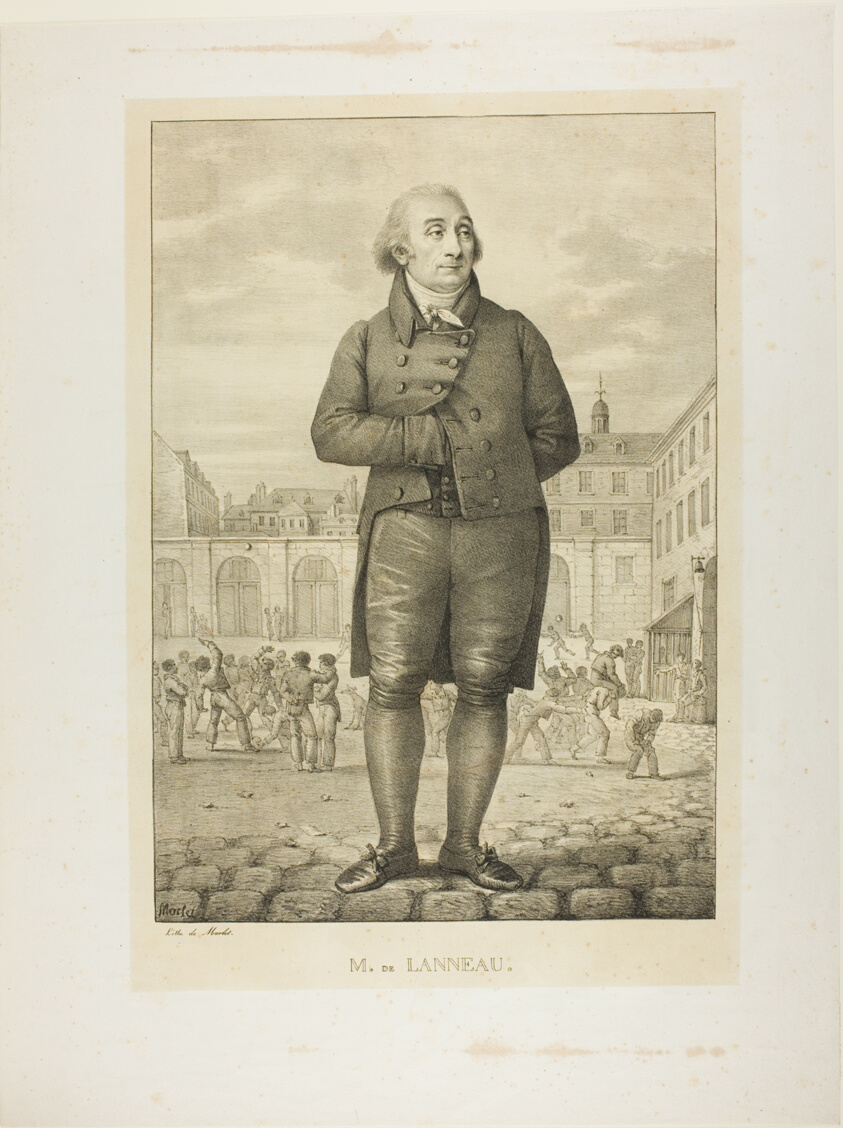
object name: Print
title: Portrait of M. de Lanneau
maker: Jean Henri Marlet (French, 1771-1847)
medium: Lithograph in black over fawn lithographic tint on ivory wove paper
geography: France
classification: lithograph; print; prints and drawing